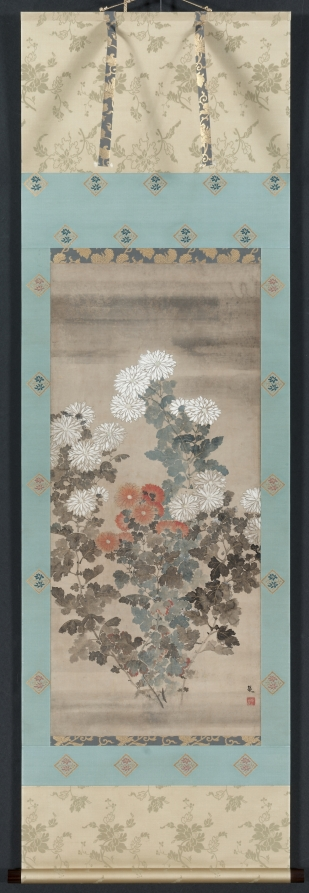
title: Chrysanthemums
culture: Japan, Edo period (1615–1868)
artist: Kitagawa Sōsetsu (Japanese, active 1639–50)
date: mid 1600s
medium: hanging scroll; ink and color on paper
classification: Painting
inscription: signature and seal: "Inen."